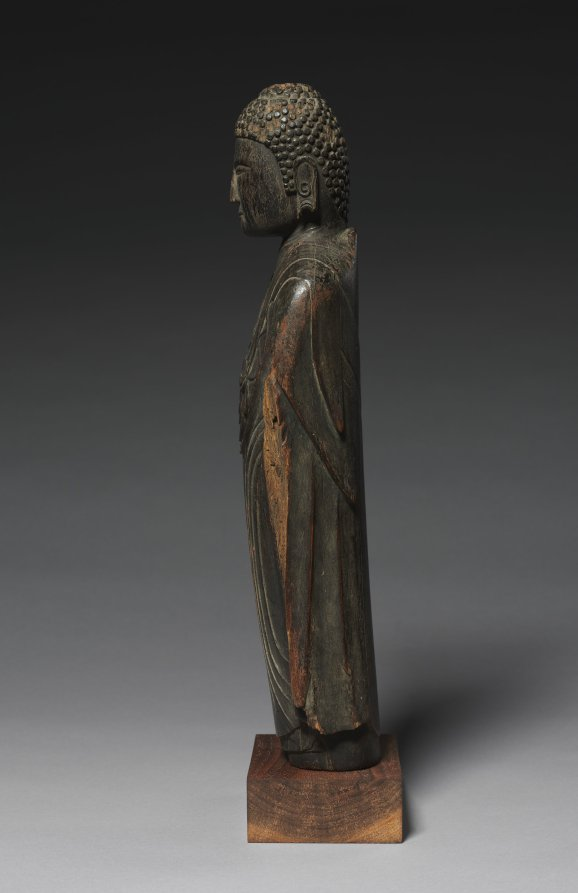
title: Sakyamuni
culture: Korea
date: 1900s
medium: wood with traces of black lacquer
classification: Sculpture